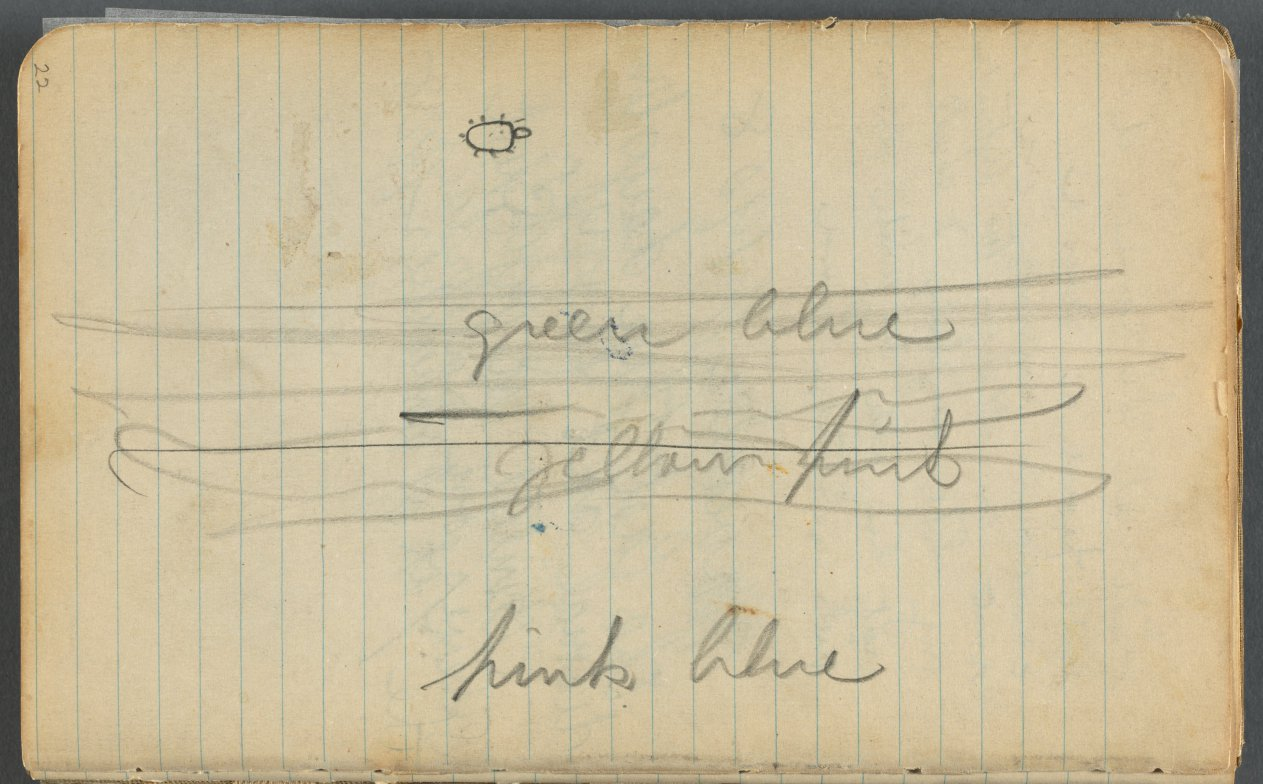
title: Sketchbook, page 022: Notes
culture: America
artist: Maurice Prendergast (American, born Newfoundland [now Canada], 1858–1924)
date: 1905–10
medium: graphite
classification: Bound Volume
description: This sketchbook contains 69 pages of drawings, a diary largely devoted to the state of the artist's health, and a three-page discourse on the nature of genius and ideas.